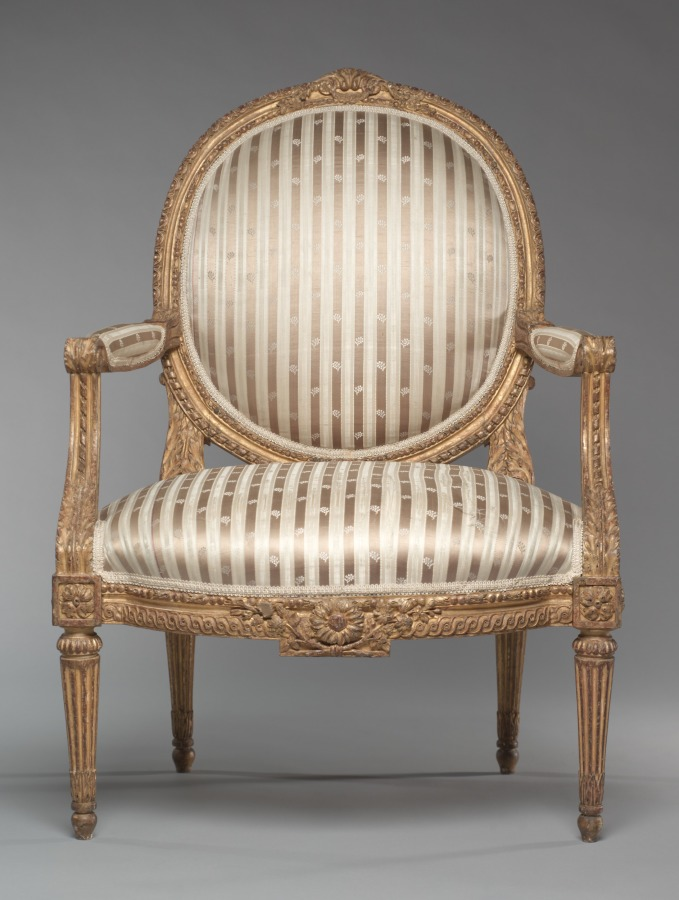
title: Pair of Armchairs (Fauteuils)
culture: France, 18th century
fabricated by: Jean-Baptiste II Tilliard (French, 1797)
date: c. 1765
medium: carved and gilded wood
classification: Furniture and woodwork